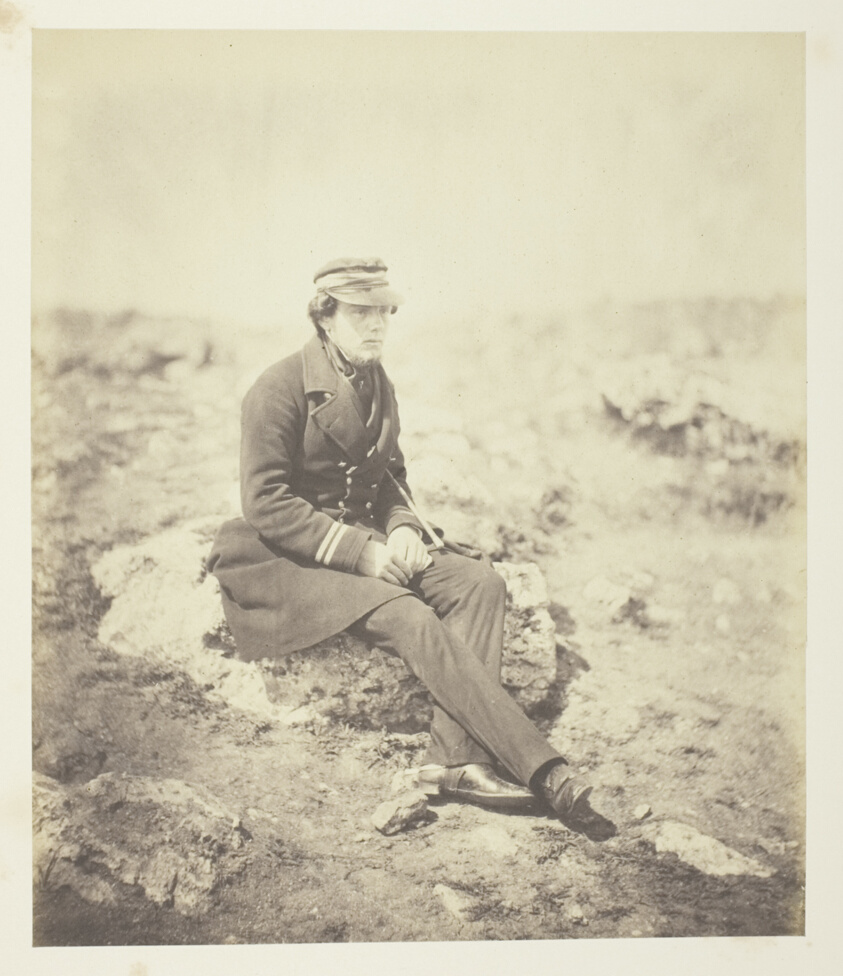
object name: Photograph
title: Untitled (Admiral Frederick Augustus Maxse)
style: 19th century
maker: Roger Fenton (English, 1819–1869)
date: 1855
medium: Salted paper print, plate 39 from the album "Photographs Taken in the Crimea" (1856)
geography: England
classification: salted paper print; photographic process; photography; photograph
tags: Collected by Hugh Edwards, Crimea 1856